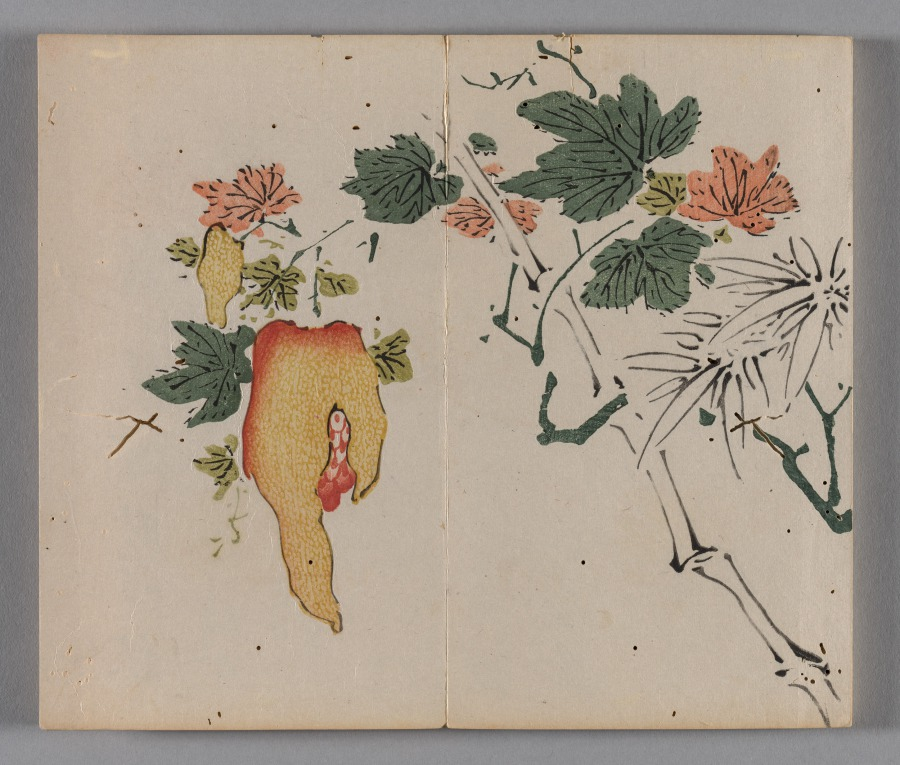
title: Ten Bamboo Studio Painting and Calligraphy Handbook (Shizhuzhai shuhua pu): Fruit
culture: China, Qing dynasty (1644-1911)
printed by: Hu Zhengyan (Chinese, c. 1584–1674)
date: 1633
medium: Woodblock-printed book; ink and colors on paper; first edition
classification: Print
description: Color printing reached a level of perfection in the early 1600s, as seen in this Ten Bamboo Studio Collection of Calligraphy and Painting and the Mustard Seed Garden Manual of Painting (printed 1679 and 1701). The painterly quality, precision in registering (aligning) the woodblocks, and harmonious colors made them the most successful color print editions in Chinese history. Both editions were printed and compiled in Nanjing, spread nationwide, and had a great impact on the arts in Japan and Korea.